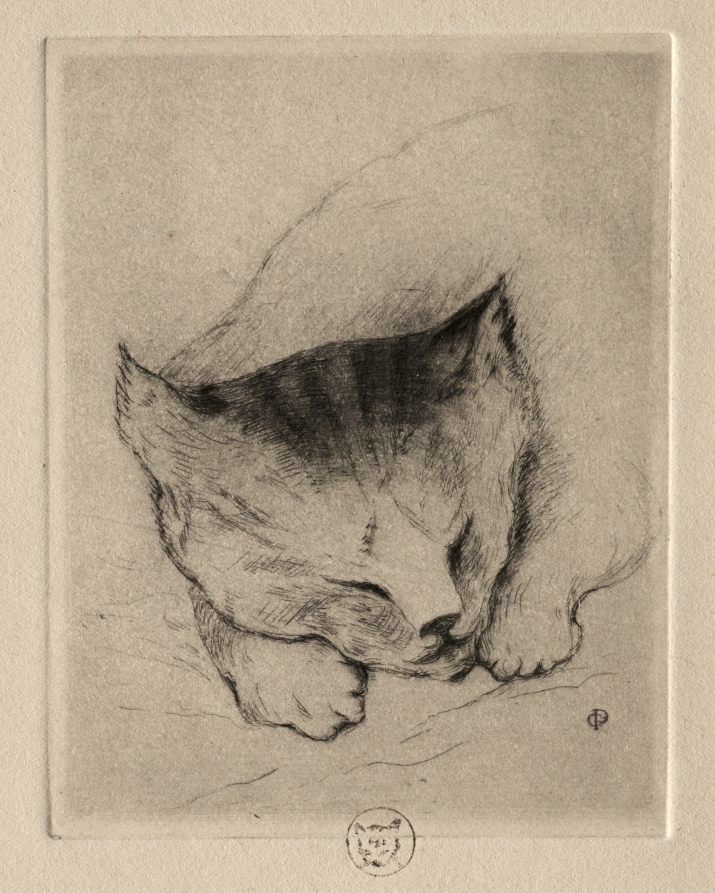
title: Six Etchings: Head of a Kitten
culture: France, 19th century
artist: Paul Gachet (French, 1828–1909)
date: 1895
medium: etching and drypoint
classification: Print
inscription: verso, in ink: Tete de jeune chat